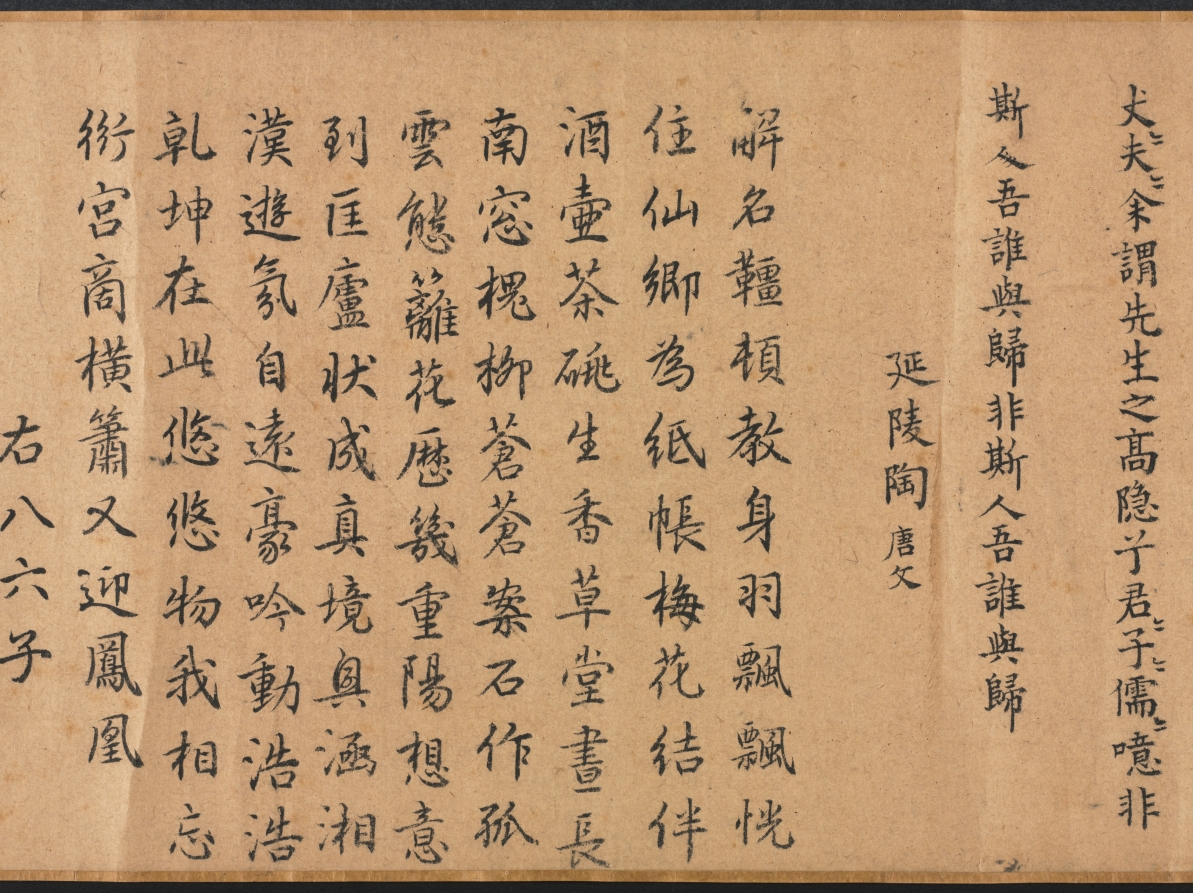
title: Leisure Enough to Spare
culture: China, Yuan dynasty (1271-1368)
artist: Yao Tingmei (Chinese, active mid-1300s)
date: 1360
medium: handscroll, ink on paper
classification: Painting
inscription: 至正廿年春正月_日作此併系鄙語于尾 地偏人遠閉柴關，滿院松陰白晝閒。 眼底風塵渾忘却，坐看流水臥看山。 吳興姚廷美畫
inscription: 23 colophons and 53 seals (dates unavailable for some): 1 colophon, dated 1360, and 2 seals of Yang Weizhen (1296-1370); 1 colophon and 3 seals of Wan Yi; 1 colophon of Zhang Junde; 1 colophon and 3 seals of Angji (act. ca. mid-14th c.); 1 colophon and 1 seal of Xu Shiquan; 1 colophon and 3 seals of Gao Yu; 1 colophon and 2 seals of Li Mingfu; 1 colophon and 2 seals of Lu Lin; 1 colophon and 1 seal of Zhang Qian; 1 colophon of Tao Tangwen; 1 colophon and 1 seal of Wu Yuangui (act. ca. 1300-60); 1 colophon of Bao Jiong; 1 colophon of Wang Zao; 1 colophon and 1 seal of Ma Chuyi; 1 colophon and 1 seal of Lin Yizhuang; 1 colophon and 1 seal of Gu Shunju; 1 colophon and 2 seals of Wang Jing; 1 colophon and 2 seals of Lin Shouchang; 1 colophon and 1 seal of Gao Zhidao; 1 colophon of Lin Xun; 1 colophon, dated 1359, and 2 seals of Meng Weicheng (act. mid-14th c.); 1 colophon and 1 seal of Meng Zhiji (act. mid-l4th c.); 14 seals of Liang Qingbiao 梁清標 (1620-1691); 1 poem dated 1755 and 5 seals of the Qianlong 乾隆 emperor (r. 1736-95); 2 seals of the Jiaqing 嘉慶 emperor (r. 1796-1821); 3 seals of the Xuantong 宣統 emperor (r. 1909-11).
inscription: Title on frontispiece by Zhang Bi 章弼: Signed Gongchen 拱辰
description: Seclusion and leisure—the ideals of the literati, or scholar-gentlemen—are expressed in this mature work by Yao Tingmei. The theme acquired special meaning at a time of the military uprisings near the end of the Yuan dynasty. Dedicated to an ascetic named Du, this work combines painting, calligraphy, and poetry; following the painting are more than 20 poems and essays written by notable scholars, one of whom was the calligrapher Yang Weizhen. It reveals not only the aesthetic taste of the literati but also the practice of contributing artistic and literary works to fulfill social obligations. Yao's painting demonstrates his individual style derived from various ancient masters (Guo Xi, Dong Yuan, and Juran). Yang Weizhen's calligraphy exhibits his bold, vigorous style and his intent to capture the spirit of antiquity in art.